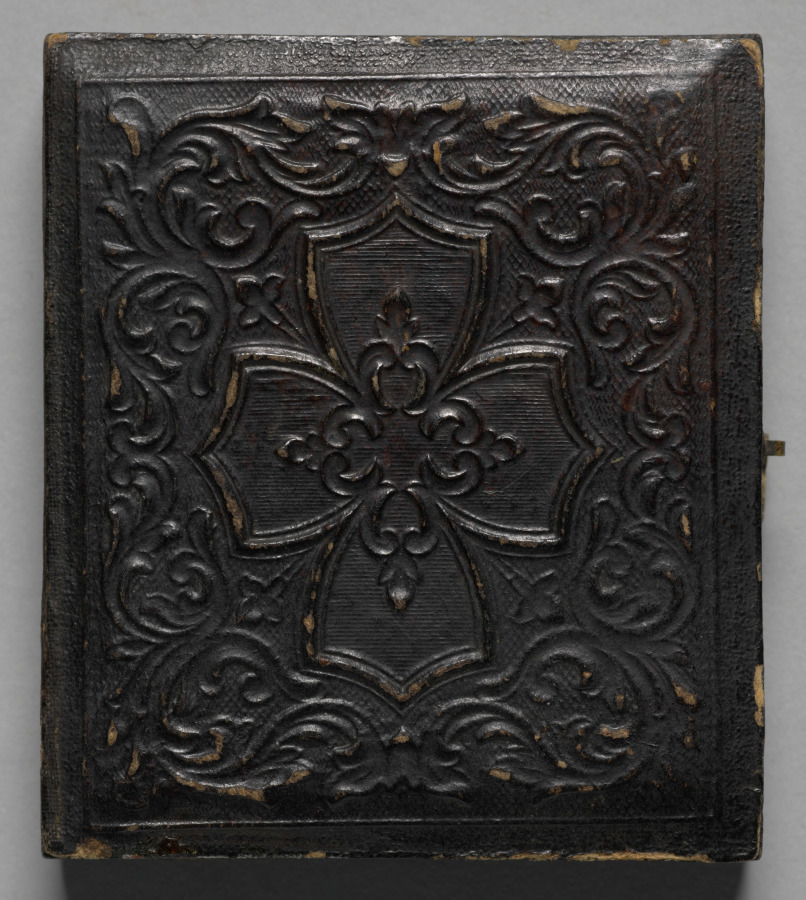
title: Civil War soldier with painted bivouac background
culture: America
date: c. 1861–65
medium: ambrotype, sixth plate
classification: Photograph